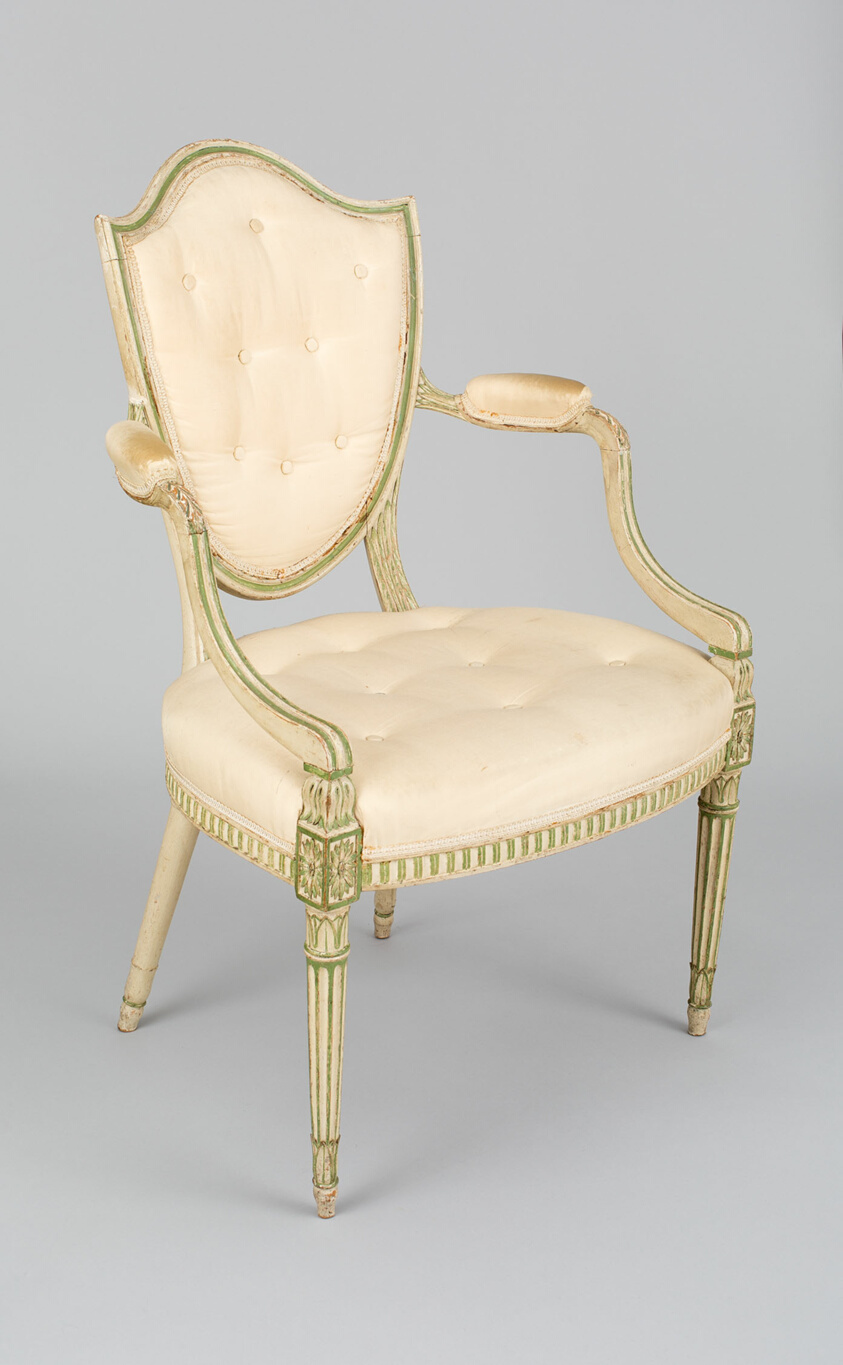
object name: Furniture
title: Armchair (one of a pair)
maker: England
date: c. 1770/80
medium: Painted beech, modern upholstery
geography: England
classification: seating; furniture; european decorative arts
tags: furniture